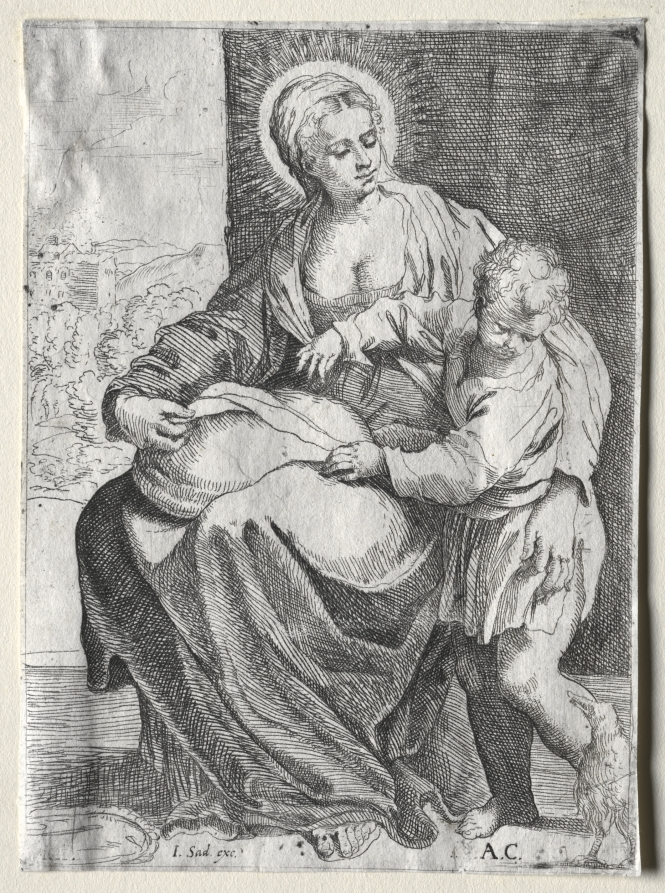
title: Madonna with the White Raven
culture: Italy, 16th century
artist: school of Annibale Carracci (Italian, c. 1560–1609)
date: 1500s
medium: etching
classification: Print